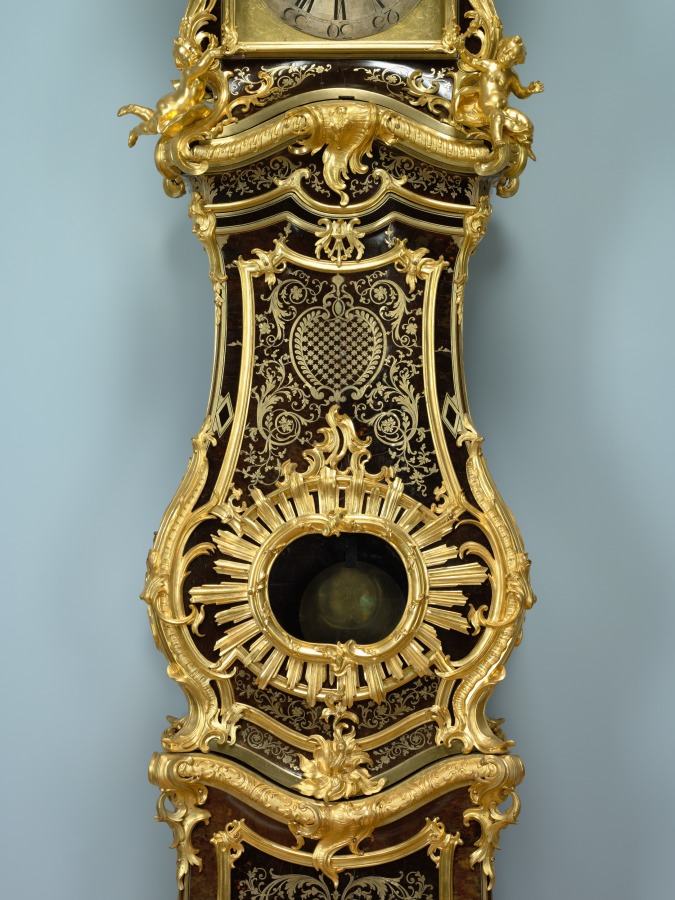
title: Tall- case Clock (Regulateur)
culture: France, Paris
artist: Jean-Pierre Latz (French, 1691–1754)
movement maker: Stollewerck (French)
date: 1744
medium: boulle marquetry with gilt bronze mounts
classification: Furniture and woodwork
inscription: incised on the back of the lowest front panel: .LATZ . A . PARISIIS . FECIT ./. MDCCXLIV; engraved on the clock face: Stollewerck/Paris.